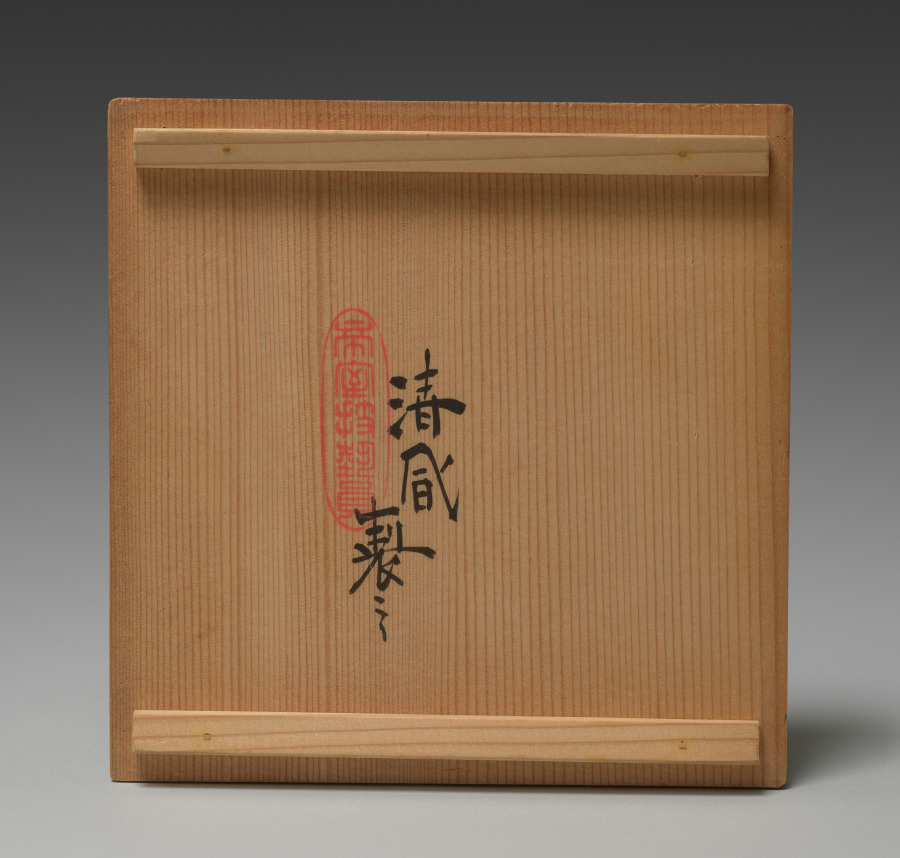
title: Flower Vase with Floral Scroll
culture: Japan, Meiji period (1868–1912)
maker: Seifū Yohei III (Japanese, 1851–1914)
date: 1893–1914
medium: Porcelain with underglaze colors and green glaze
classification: Ceramic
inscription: 清風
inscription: 帝室技芸員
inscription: 金聲玉振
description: The upper part of this vase is painted in underglaze blue with a floral scroll of leaves accentuated with a single chrysanthemum motif on each face and bound at top and bottom with single blue lines. The box lid for the vase is short on detail; the inscription notes only that it is a flower vase with underglaze blue. It is possible that the box is a mismatch because the inscription does not mention the vase’s more distinctive feature: the deep green glaze on its lower half, which is seen much less frequently among Yohei III’s works. This glaze may be an example of a dark green porcelain glaze called rōkanji, which the artist invented in 1892. The name of the glaze comes from Chinese, in which it is pronounced langgan. It may literally mean “tinkling sound of jade” and could refer to malachite, among other proposed identifications.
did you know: The center of each chrysanthemum has a crescent-shaped design at the top filled with a very pale yellow wash under the transparent glaze.